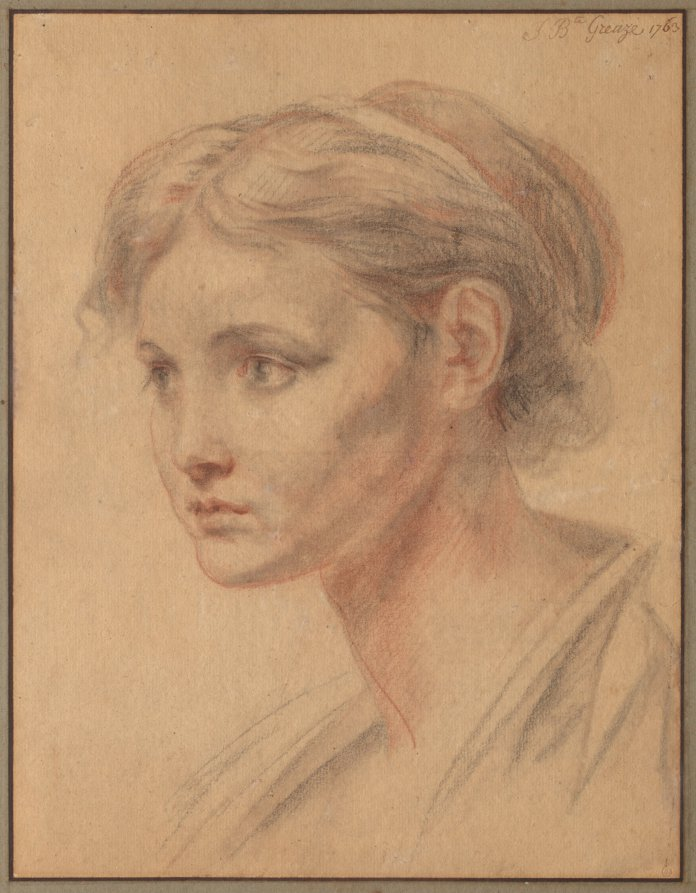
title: Head of a Girl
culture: France, 18th century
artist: Jean-Baptiste Greuze (French, 1725–1805)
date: 1763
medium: black and red chalk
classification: Drawing